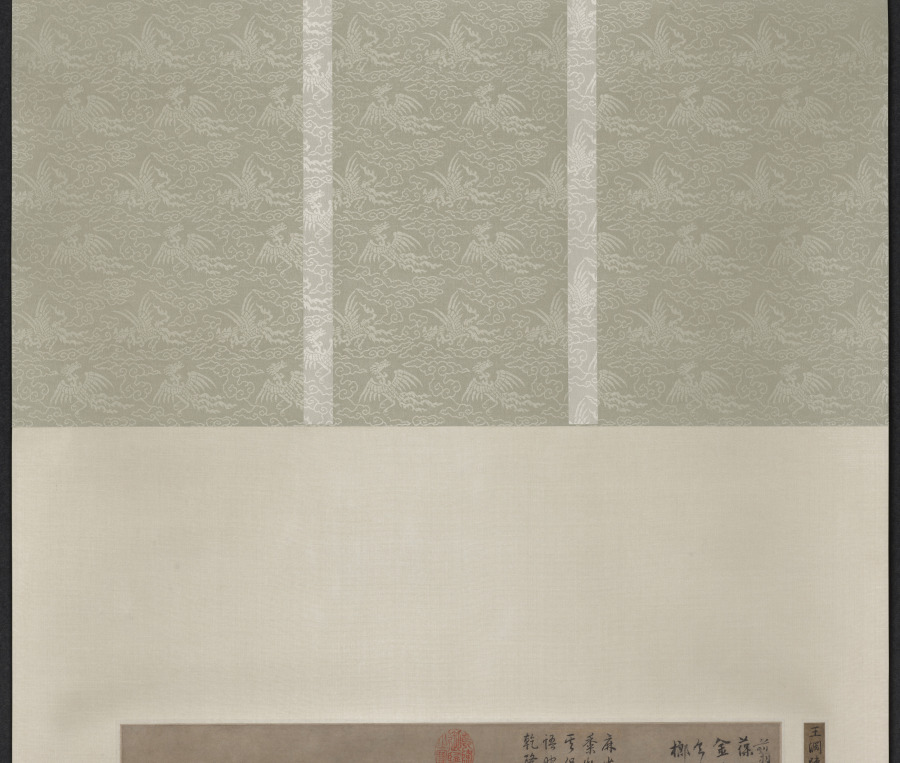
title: Quails and Sparrows in an Autumn Scene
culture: China, Yuan dynasty (1271-1368)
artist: Wang Yuan (Chinese, c. 1299-after 1366)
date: 1347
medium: hanging scroll, ink on paper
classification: Painting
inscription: 至正丁亥春 錢塘王淵若水寫秋景鶉雀圖 [印] 澹轩; [印] 若水; [印] 墨妙筆精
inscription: 翦翦輕風搖翠葆，團團清露滴金叢。 劍南畫手今何在，冷落賓榔枸杞新。 鐵篴 [印] 杨维桢印; [印] 廉夫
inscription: 1 inscription and 10 seals of the Qianlong emperor (r. 1736-95)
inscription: 4 seals of Zhang Heng 張珩 (1915-1963)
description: The flower-and-bird subjects here are depicted in a meticulous manner, echoing the academic tradition but translating the customarily colored images to plain monochrome. Fine ink lines combined with carefully graded washes define the contours and give subtle modeling to the natural forms. Wang Yuan excelled in flower-and-bird subjects as well as landscape and figure paintings. A child prodigy, he was instructed by the great Yuan master Zhao Mengfu at an early age.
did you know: Wang Yuan was from Qiantang, today’s Hangzhou in eastern China.